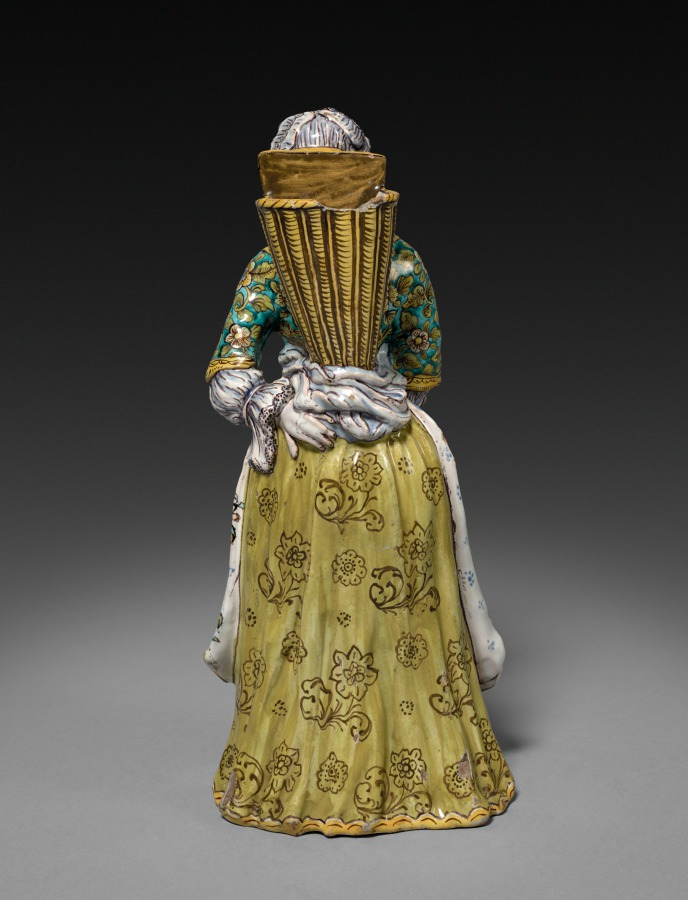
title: Figure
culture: France, Strasbourg, 18th century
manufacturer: Strasbourg Factory (France)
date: 1745–50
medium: faience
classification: Ceramic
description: For several decades in the middle of the 18th century the Hannong family were proprietors of one of the best and most influential French faience factories at Strasbourg. Here German and French ceramic styles and techniques met and were fused. These figures were copied from a pair executed in Chantilly porcelain which in turn relied on a Meissen prototype.